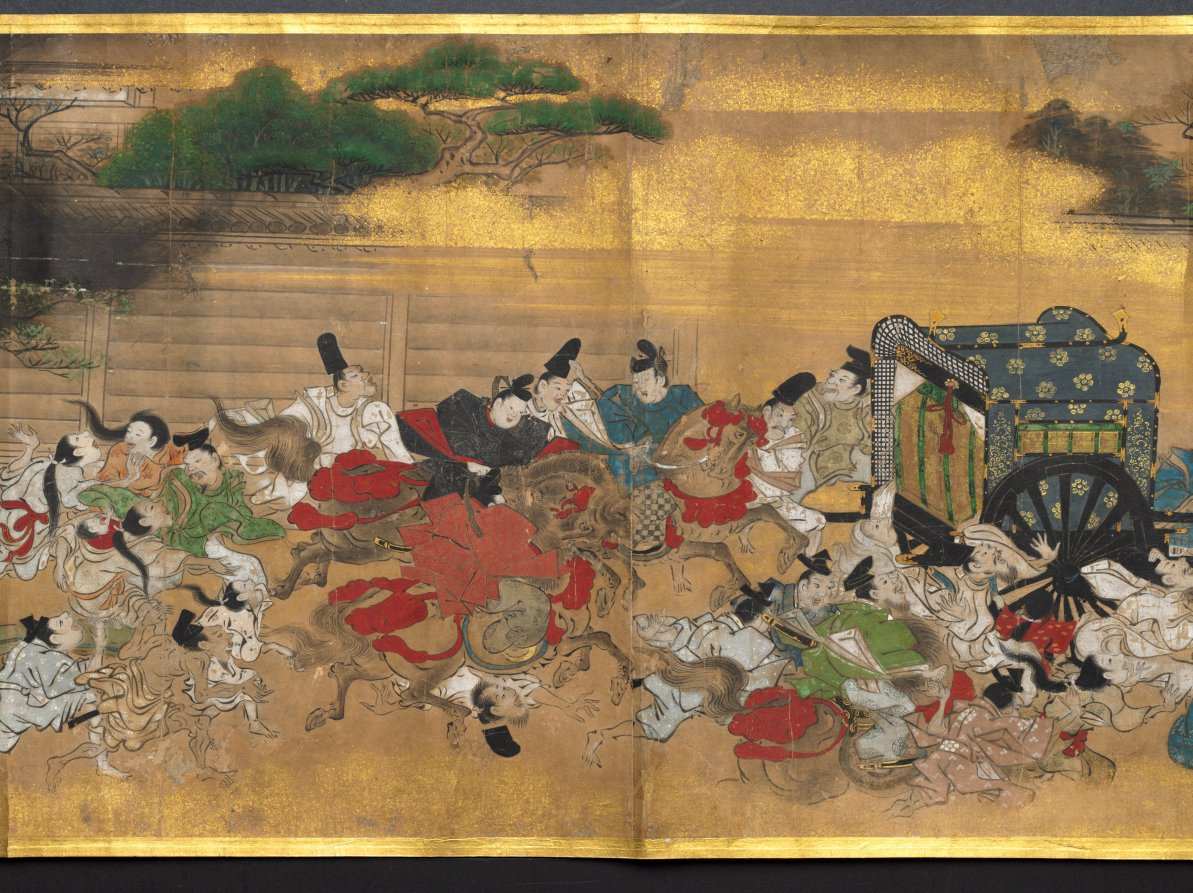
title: People Fleeing from a Fire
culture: Japan, Edo period (1615–1868)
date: 1615–1868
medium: Handscroll; color and gold on paper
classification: Painting